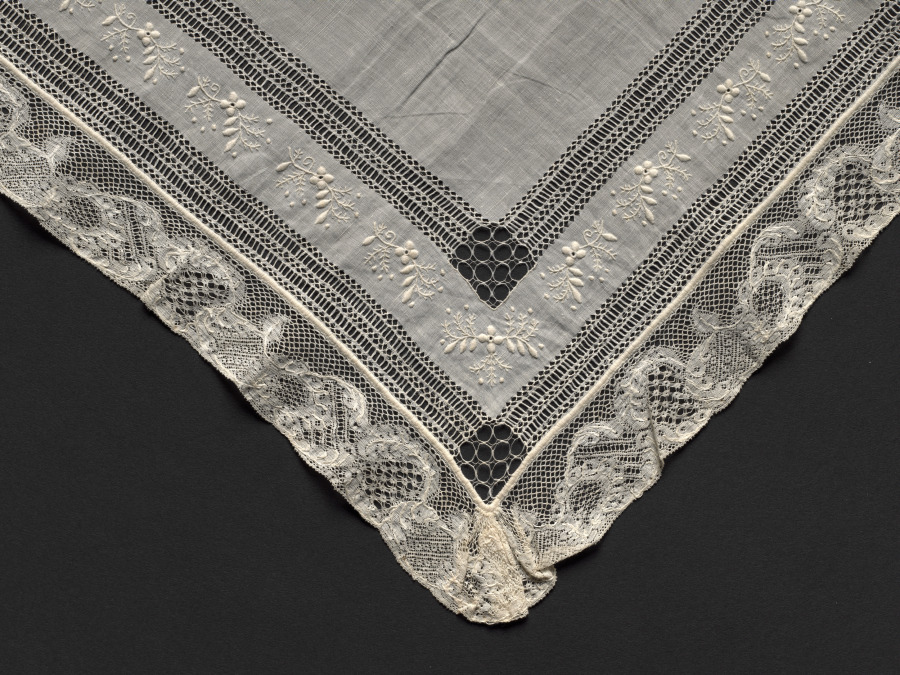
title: Lace Handkerchief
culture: Flanders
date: 1800s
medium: Plain weave linen center; machine-made lace edging with needle lace (drawnwork) and embroidery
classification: Embroidery